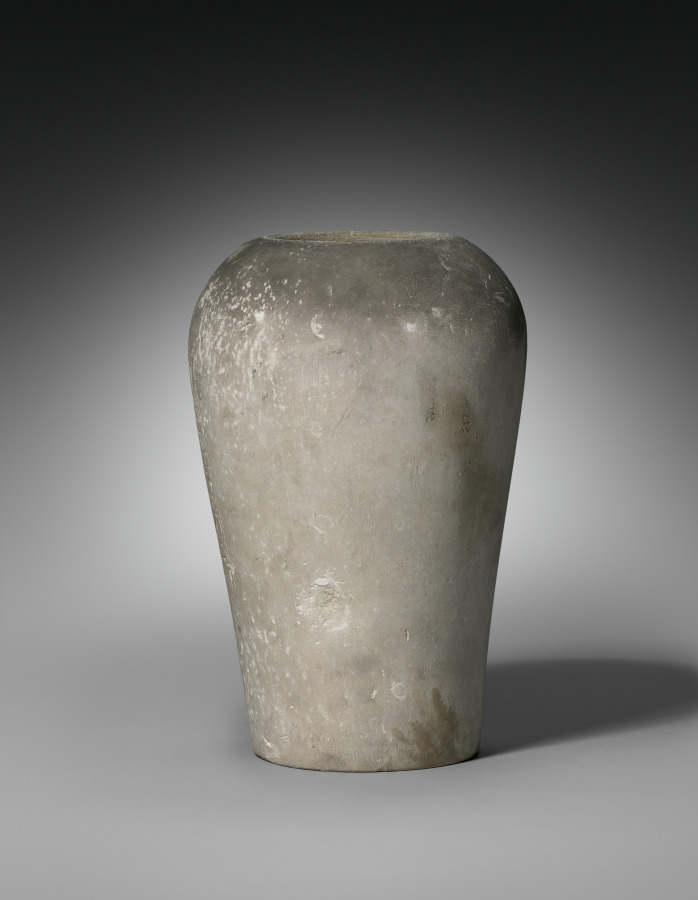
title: Canopic Jar with Lid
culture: Egypt, New Kingdom (1540–1069 BCE), Dynasty 18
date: 1540–1296 BCE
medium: limestone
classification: Funerary Equipment